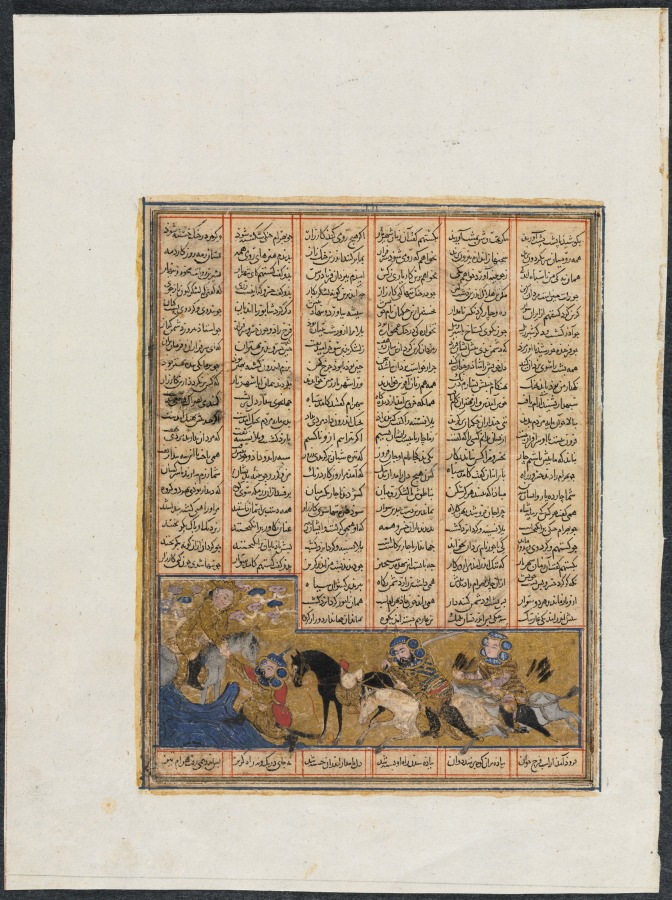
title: Khusrau Parviz Fleeing Bahram Chubineh and Being Saved by Angel Sarush (recto) from a Shahnama (Book of Kings) of Firdausi (940–1019 or 1025)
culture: Iraq, Baghdad, Ilkhanid period (1256-1353)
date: c. 1299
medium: opaque watercolor, ink, and gold on paper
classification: Manuscript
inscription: script: Naskh